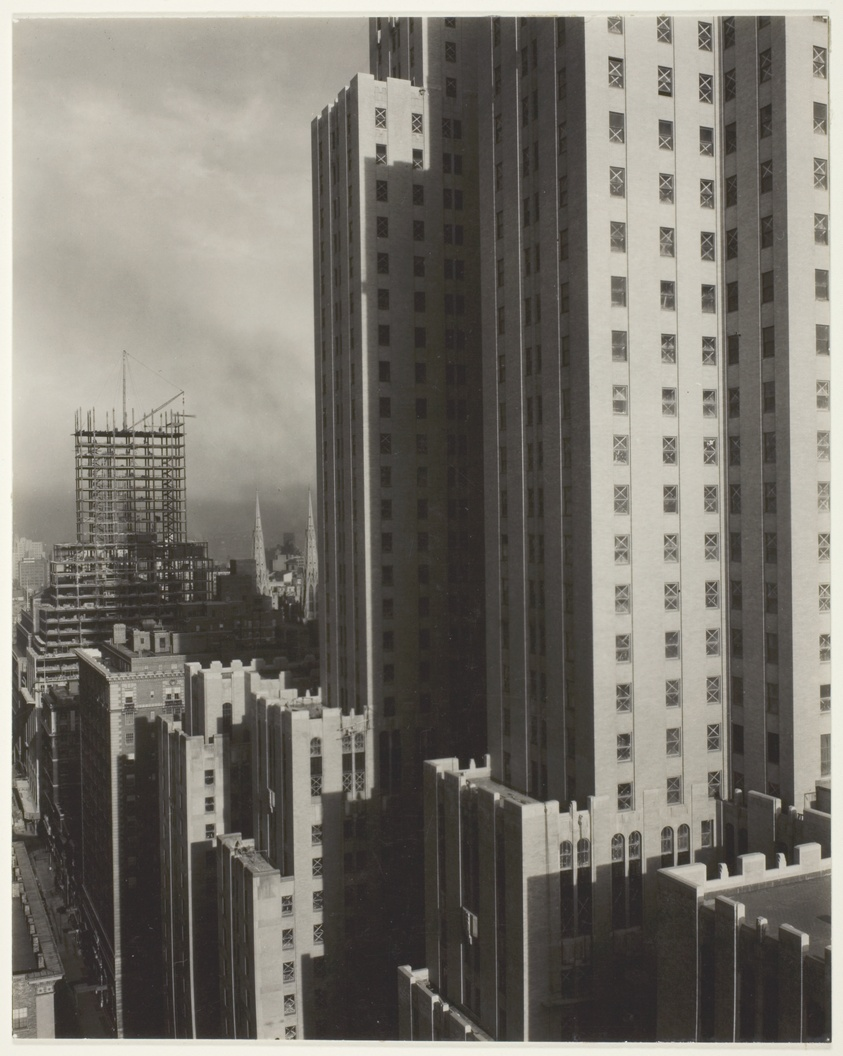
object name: Photograph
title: From My Window at the Shelton, West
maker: Alfred Stieglitz (American, 1864–1946)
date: 1931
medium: Gelatin silver print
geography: United States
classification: gelatin silver (developing-out-paper) pr; photographic process; photography; photograph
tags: cityscapes